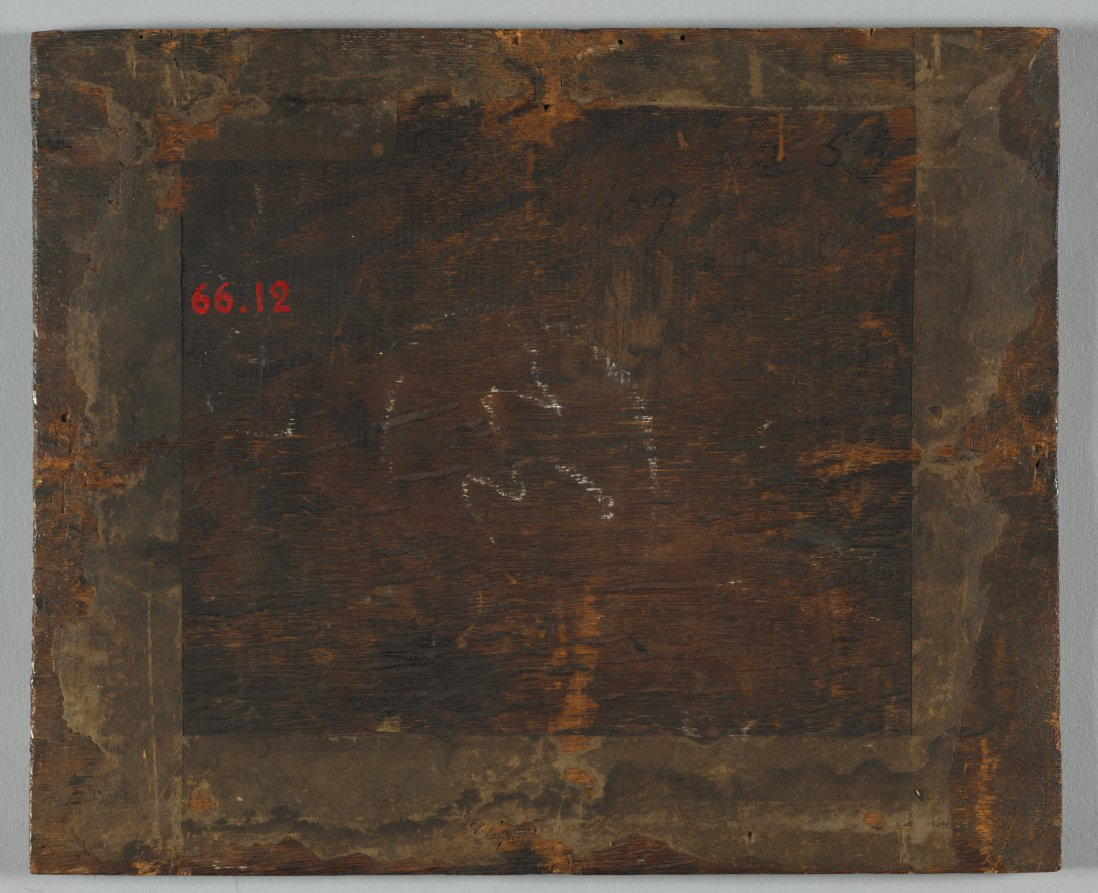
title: Sleeping Shepherds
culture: Netherlands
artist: Adriaen van de Velde (Dutch, 1636–1672)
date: 1663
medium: oil on wood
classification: Painting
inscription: Signed lower right: "A.v.Velde. f / 1663"